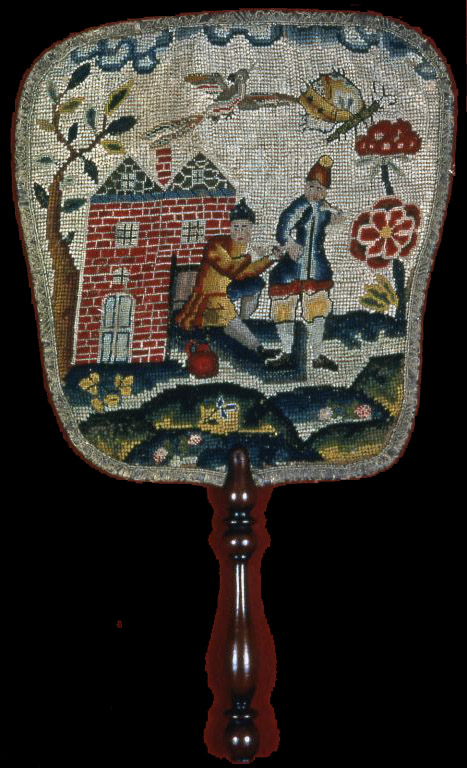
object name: Costume and Accessories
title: Fire Fans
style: jacobean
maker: France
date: 17th century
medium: Linen, plain weave; embroidered with silk floss and wool yarns in tent and cross stitches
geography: France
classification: textile; needlework (visual works); costume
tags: men, animals, birds